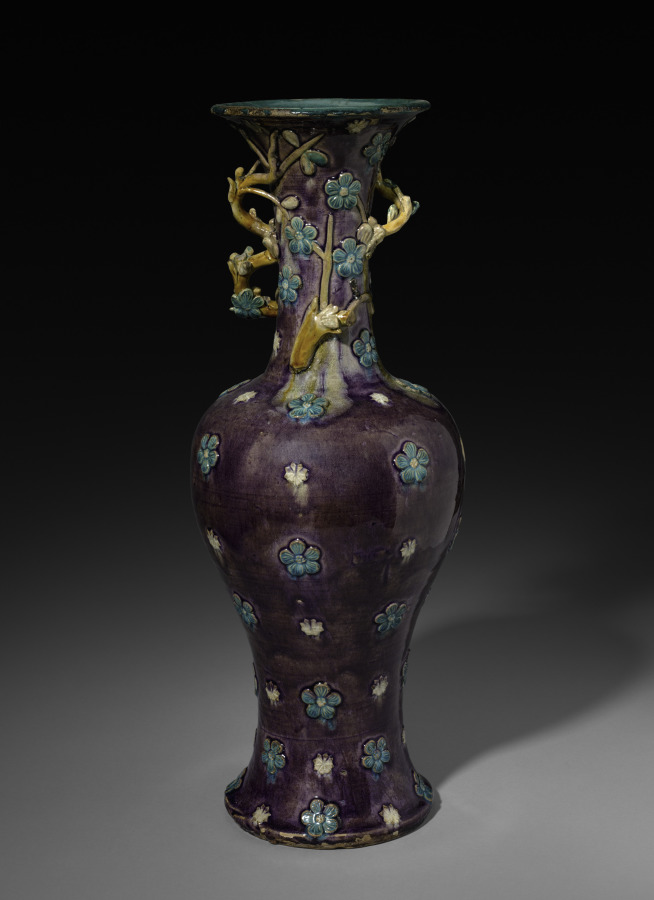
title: Vase with Branch of Plum Blossoms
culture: China, Shanxi province, Ming dynasty (1368-1644)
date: 1500s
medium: Glazed stoneware with molded and modeled decoration, Fahua ware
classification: Ceramic